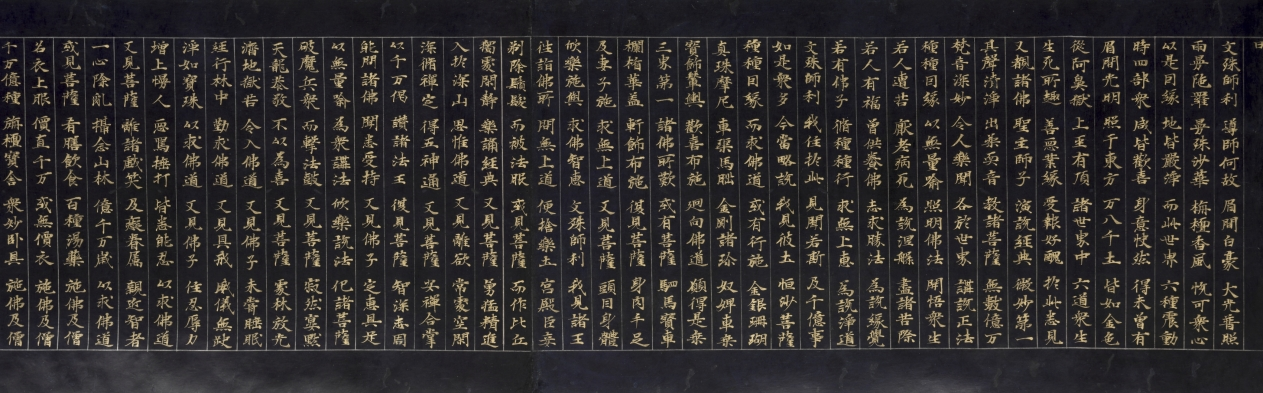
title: Lotus Sutra with a Frontispiece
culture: China, Song dynasty (960–1279)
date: late 1100s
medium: handscroll; gold ink on indigo sutra paper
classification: Painting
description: The frontispiece of this sutra, a sacred Buddhist scripture, illustrates episodes mentioned in the Buddha’s teaching. The sutra begins with a description of the historic Buddha Shakyamuni’s assembly on Vulture Peak. On the right, the Buddha sits amid members of his congregation: lohans (or arhats), bodhisattvas, gods, and other beings. The narrative proceeds from right to left. Heavenly light emanates from Shakyamuni’s brow to “illuminate the eighteen thousand worlds to the east.” Illustrated immediately below the ray is the sutra’s promise that if anyone carves or paints images of the Buddha “they will achieve the Buddha path.” The female figures in the frontispiece point to another promise made in this popular Mahayana school sutra, namely that female devotees and nuns who read the sutra are promised Buddhahood and salvation.